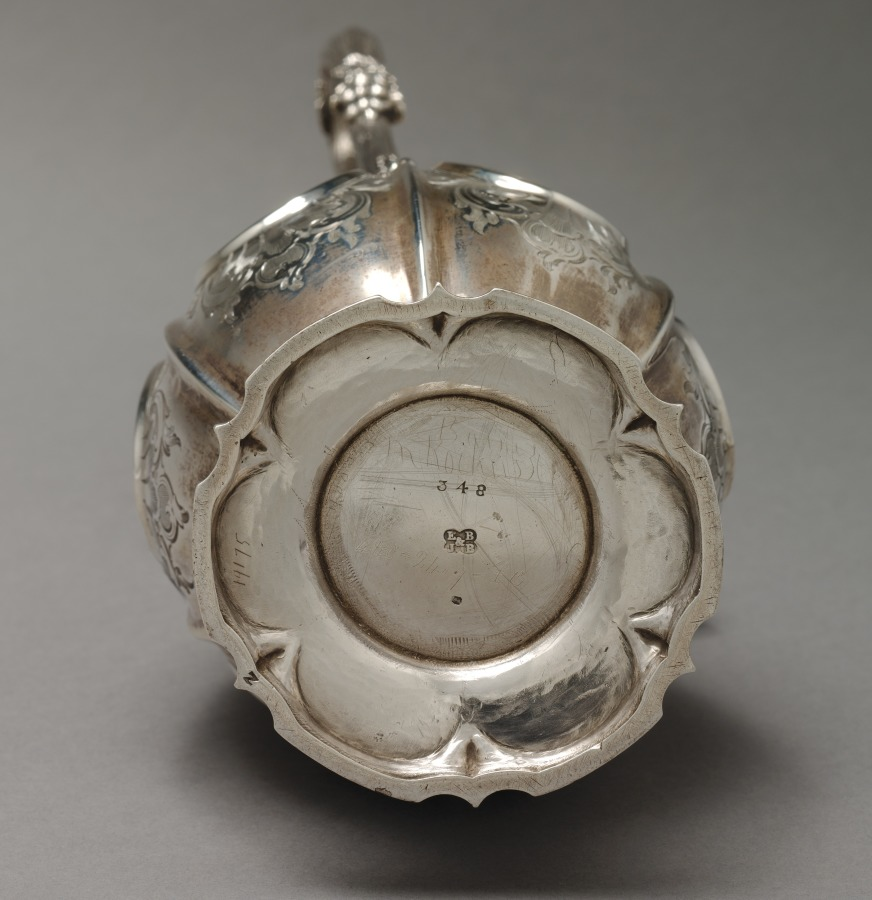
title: Pitcher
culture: England, 19th century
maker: Edward Barnard & Sons (British, c. 1680–2003)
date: c. 1870–80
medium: silver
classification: Silver